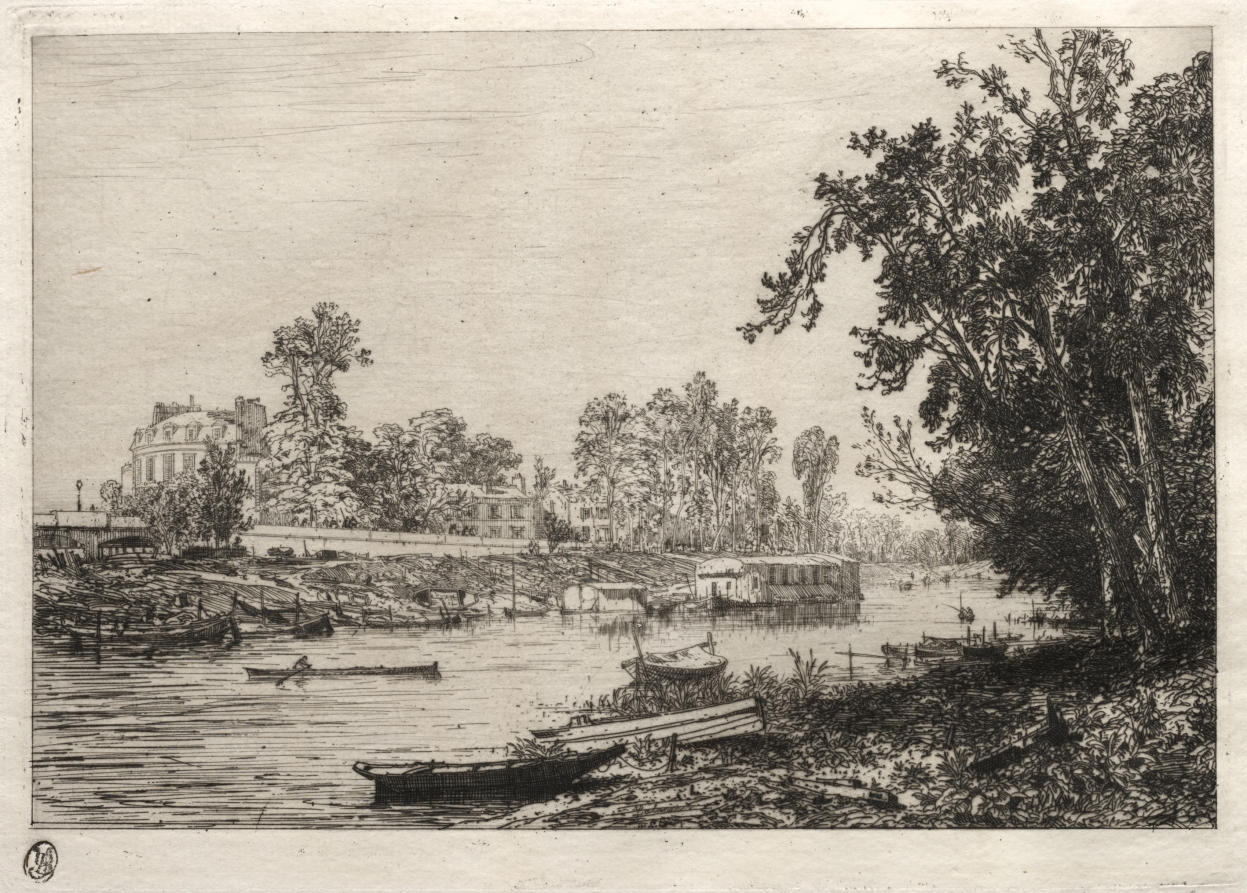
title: At Neuilly (Seine)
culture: France, 19th century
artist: Maxime Lalanne (French, 1827–1886)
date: 1864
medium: etching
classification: Print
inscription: artist's signature inscrined in graphite below image: Maxime LAlanne (l.r.); inscribed in Plate: Lalanne (l.c.)